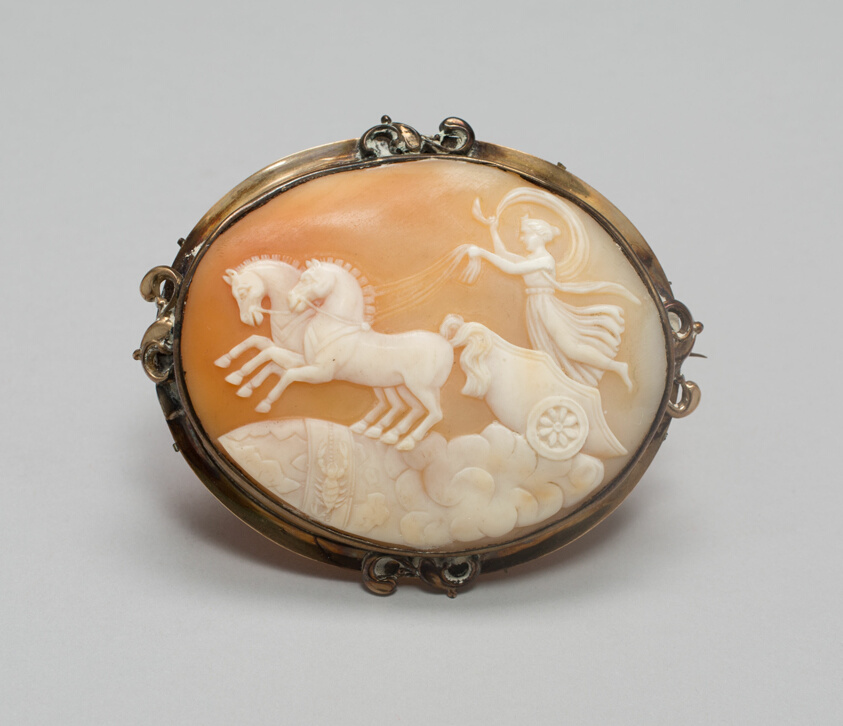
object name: Metalwork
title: Brooch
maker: Glasgow, Scotland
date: Mid 19th century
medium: Hardstone and gold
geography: Glasgow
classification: jewelry; european decorative arts; metalwork